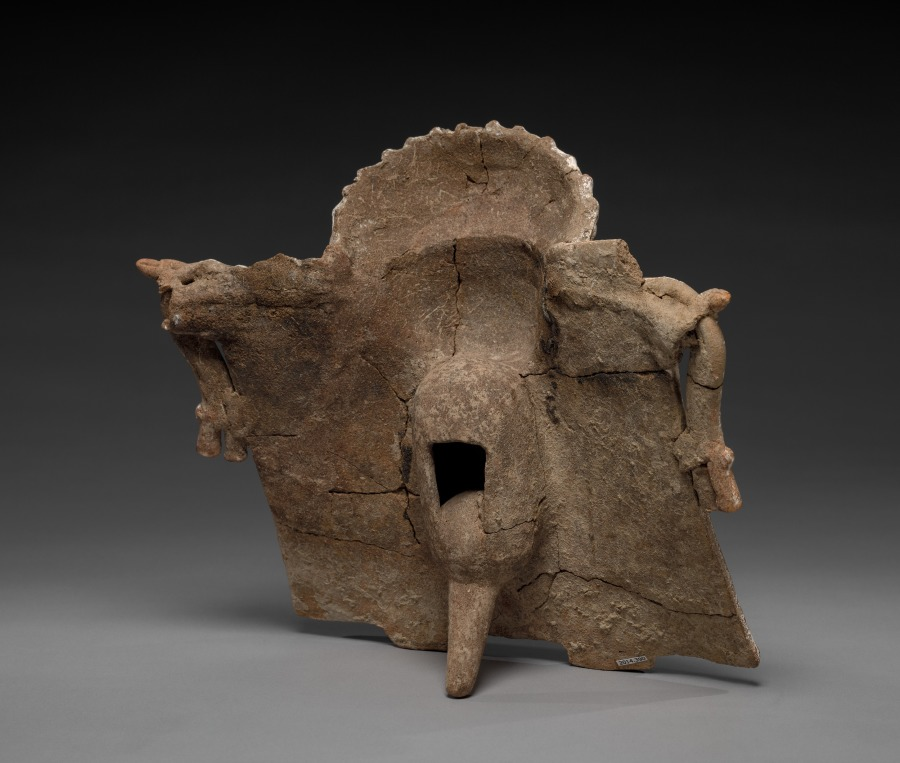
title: Standing Female Figure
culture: Mesoamerica, Veracruz, Nopiloa style?, 7th-10th century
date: 600–1000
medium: ceramic, pigment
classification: Sculpture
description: Ancient Veracruz artists used ceramic to create figural sculptures in a range of sizes, styles, and types. This beautiful, finely wrought female figure is an exceptional example. Although her identity is unknown, her adornments signal high status: ear ornaments, a large necklace, an elaborate dress that drapes over her outstretched arms, and perhaps even her front teeth, filed into a T shape, may have symbolic importance. The unfinished back, with a tripod support, suggests that the figure was meant to be seen from the front.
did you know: This lovely female’s body is a flat plaque supported by a tripod at the rear.